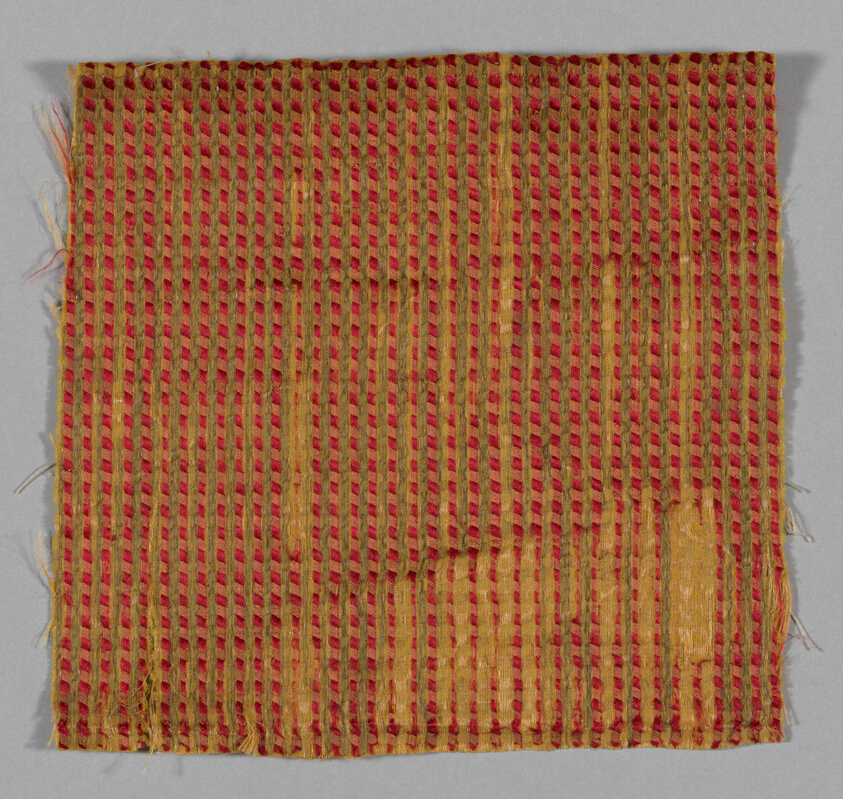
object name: Textile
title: Square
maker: India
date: 18th century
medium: Silk, plain compound twill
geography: India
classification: textile; weaving